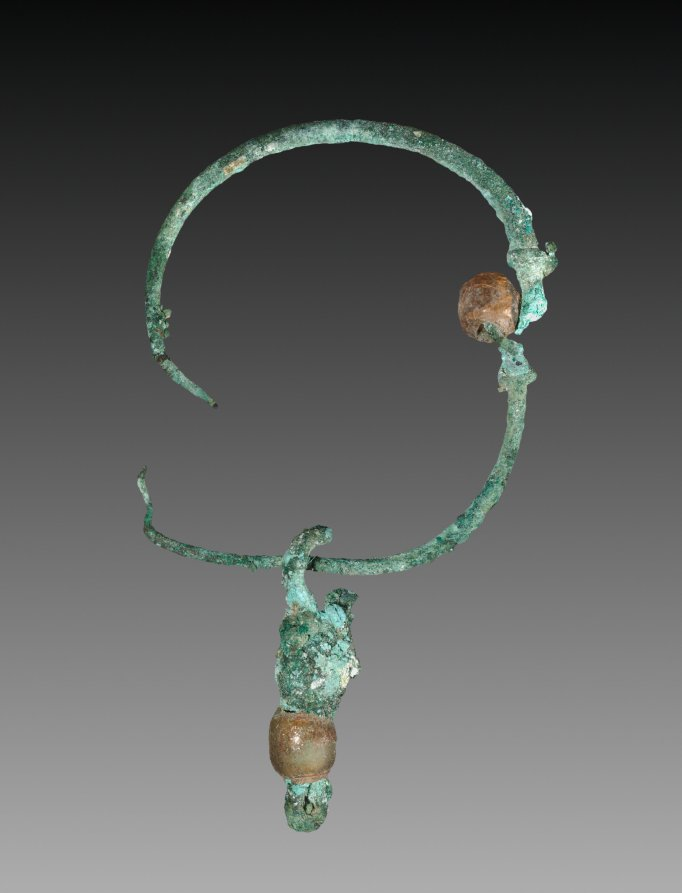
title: Earring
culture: Egypt, Greco-Roman period (332 BCE–395 CE), Roman empire (30 BCE–395 CE)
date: 30 BCE–395 CE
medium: bronze and glass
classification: Jewelry